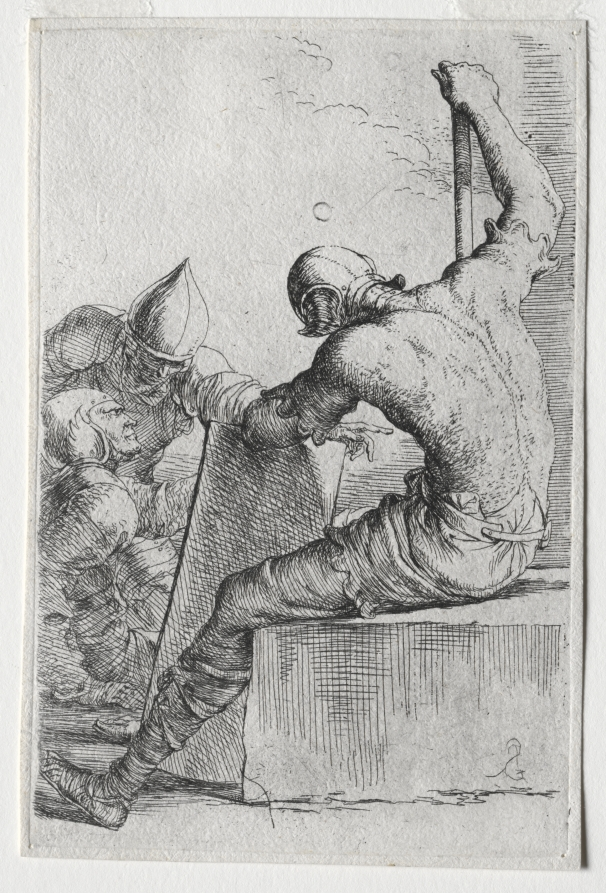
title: The Figurine Series: Figurine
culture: Italy, 17th century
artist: Salvator Rosa (Italian, 1615–1673)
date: 1656–57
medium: etching and drypoint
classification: Print